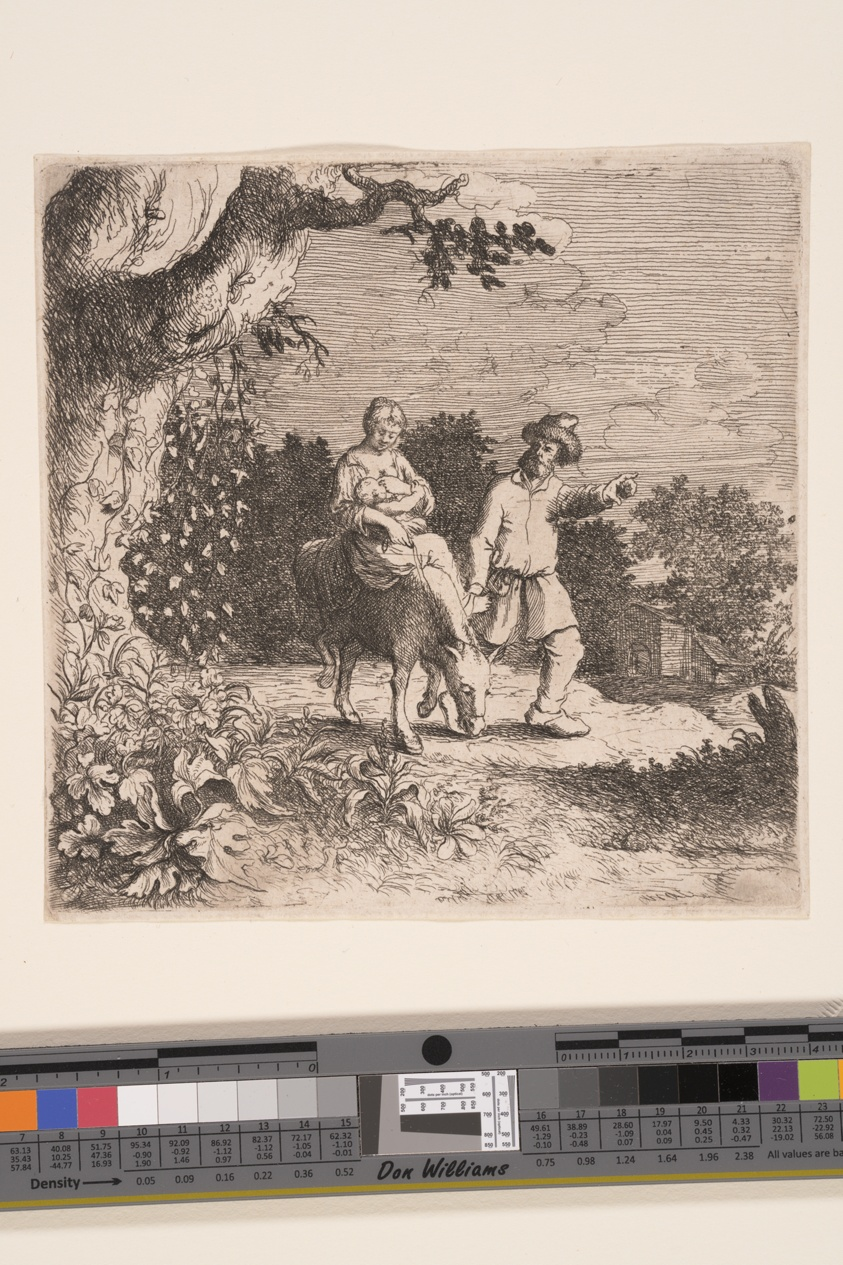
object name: Print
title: The Flight into Egypt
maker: Willem Basse (Dutch, 1613 or 1614–1672)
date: 1642/48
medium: Etching on paper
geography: Netherlands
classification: etching; paper; print; prints and drawing